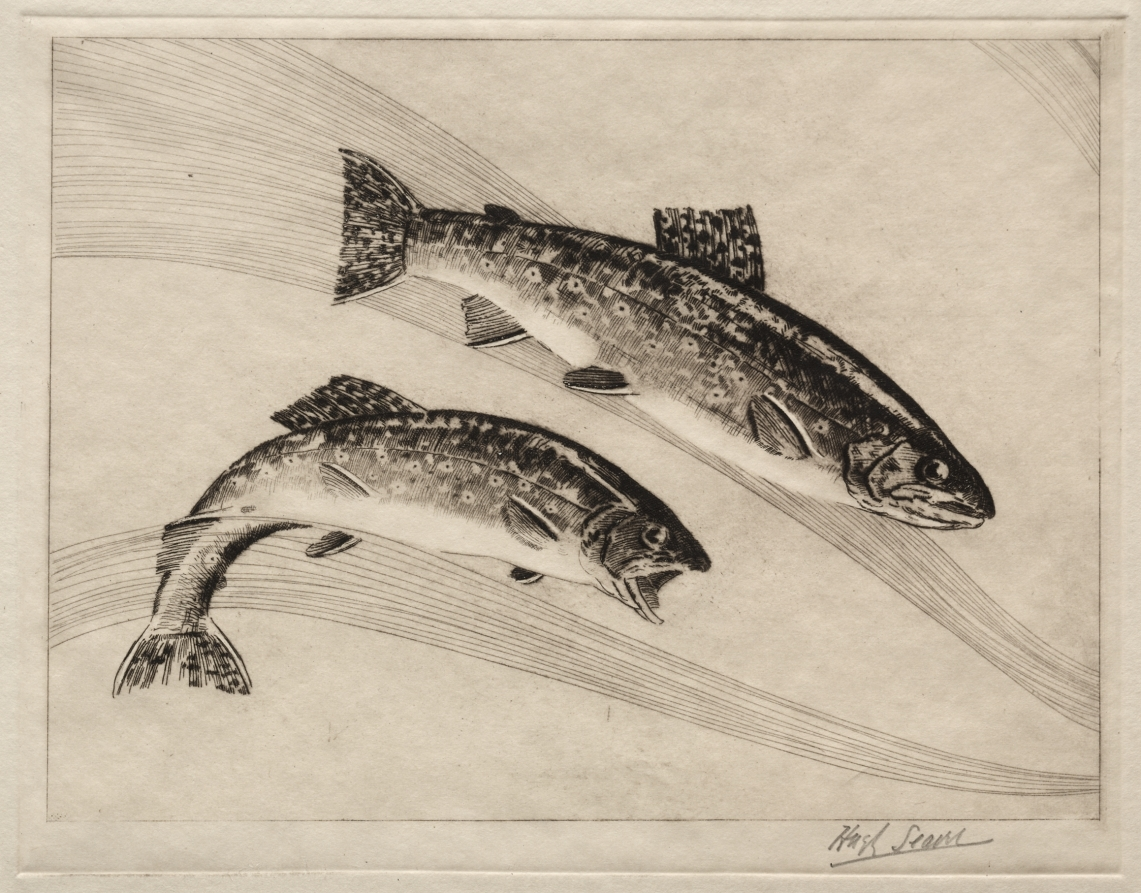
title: The Abstract Twins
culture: America, Ohio, Cleveland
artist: Hugh Seaver (American, 1896–1959)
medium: etching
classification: Print